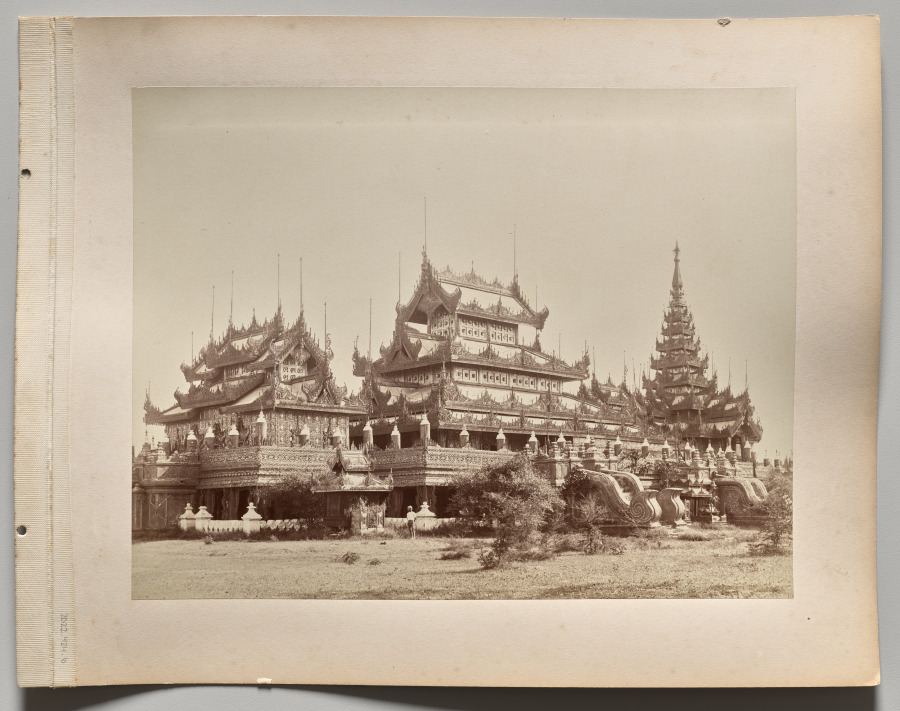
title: Untitled (ornate buildings, verso)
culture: England, 19th century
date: 1870s-1880s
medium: albumen print mounted on an album page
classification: Photograph